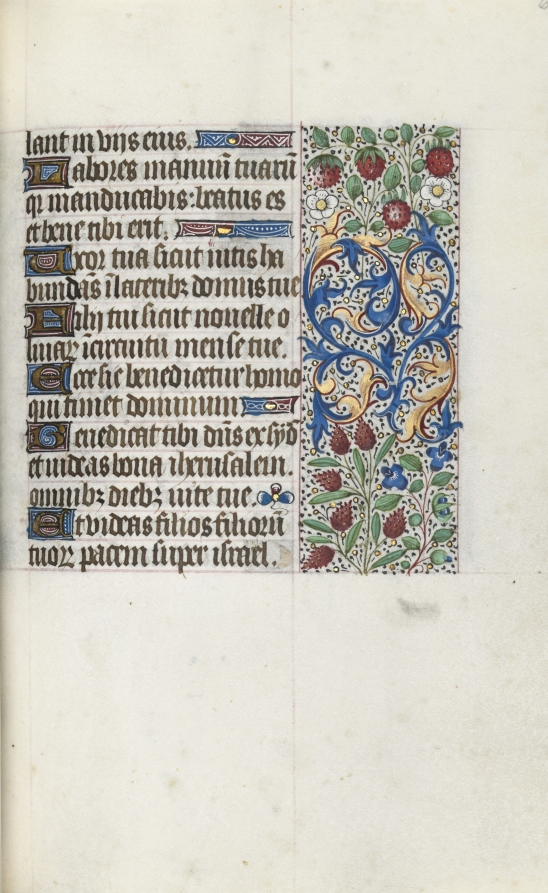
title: Book of Hours (Use of Rouen): fol. 69r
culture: France, Rouen, 15th century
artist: Master of the Geneva Latini (French, active Rouen, 1460–80)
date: c. 1470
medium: ink, tempera, and gold on vellum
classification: Bound Volume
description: In the late 1400s and early 1500s Rouen was an established and important center of book production. The city’s cathedral had a wealthy chapter that spent large sums of money to commission books and to maintain its extensive library. The stationers and booksellers would have likely been concentrated in or near the cathedral precinct. This artist, named after a manuscript now in Geneva, was Rouen’s principal illuminator during the second half of the 1400s.